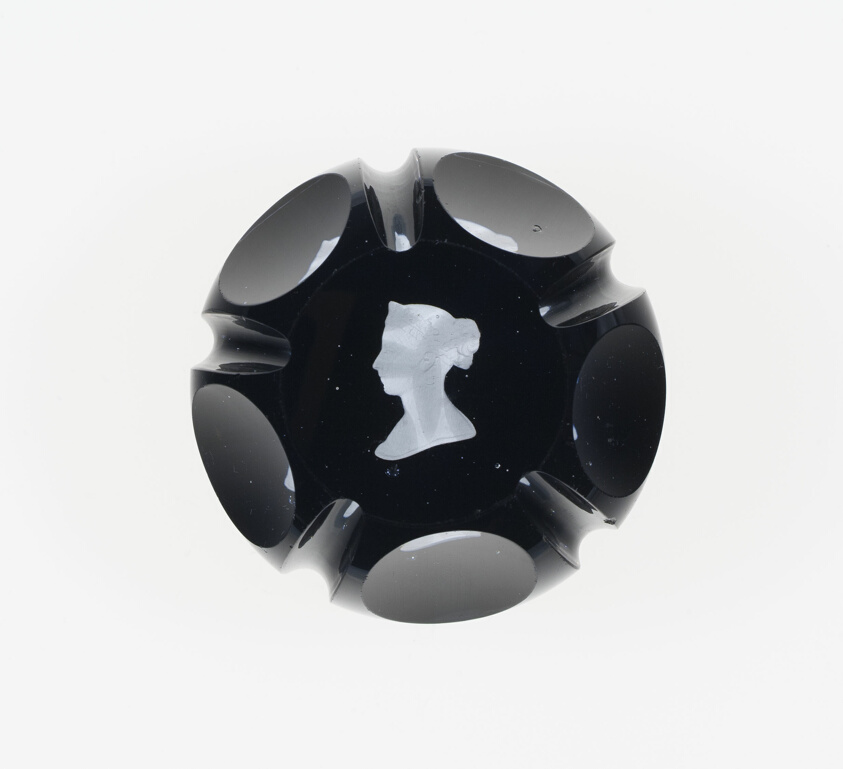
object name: Glass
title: Paperweight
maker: Clichy Glassworks (Cristalleries de Clichy); Clichy, France, 1837-1885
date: c. 1851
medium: Glass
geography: Clichy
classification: paperweight; sulphide (glass); european decorative arts; glass